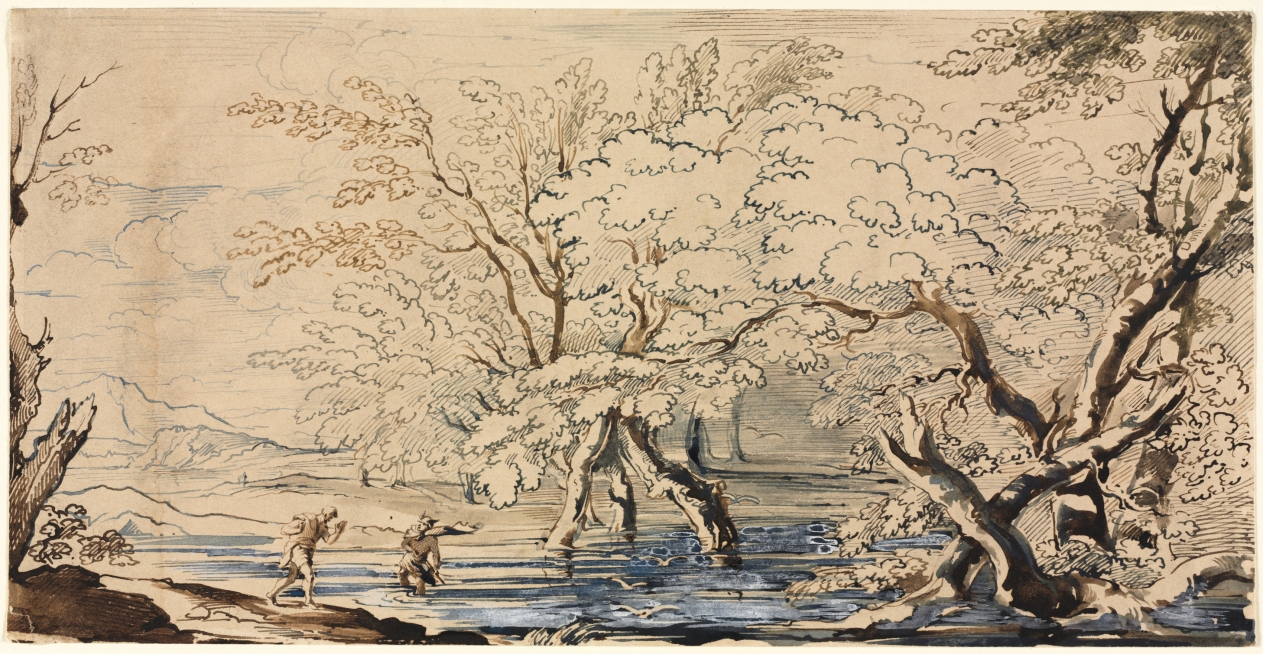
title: Mercury and Argos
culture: England, 19th century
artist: Joseph Brett (British, 1816–1848)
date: c. 1836–48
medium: pen and brown and blue ink with ink washes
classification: Drawing